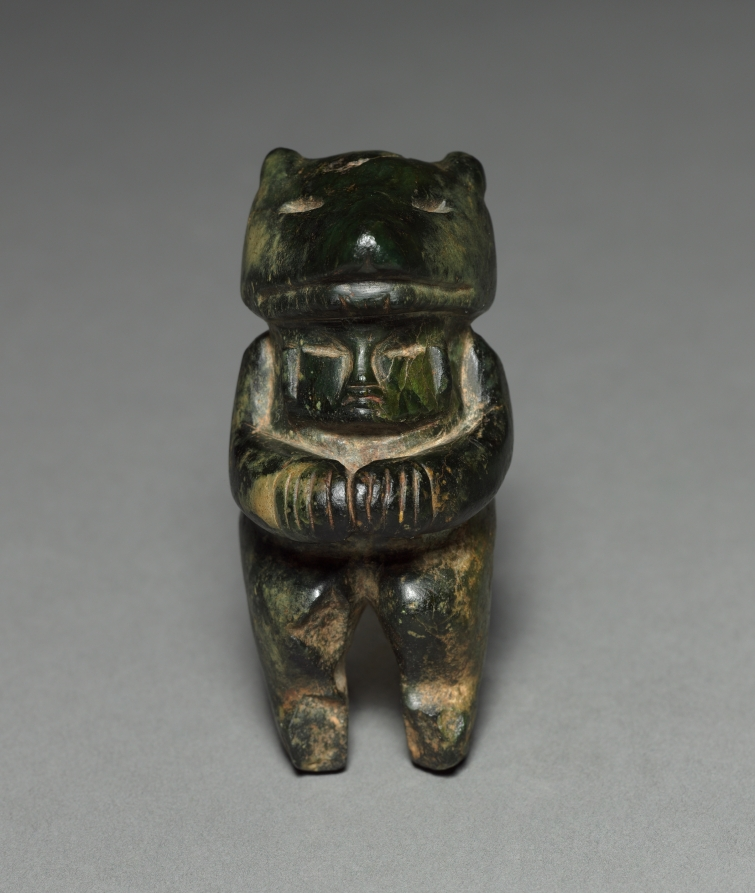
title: Figurine with Animal Headdress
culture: Pre-Columbian style(?), 20th century (?)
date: 20th Century(?)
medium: serpentine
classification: Sculpture